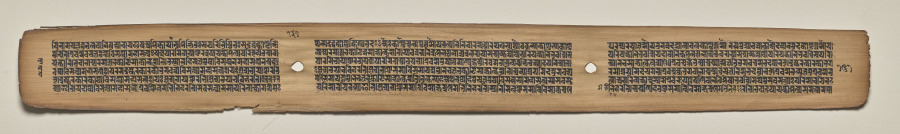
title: Text, Folio 131 (verso), from a Manuscript of the Perfection of Wisdom in Eight Thousand Lines (Ashtasahasrika Prajnaparamita-sutra)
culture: Eastern India, Bihar, Vikramashila Monastery. Painting: Nepal, Kathmandu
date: Sunday, September 14, 1119 (year 239 of the Newar Samvat in the month of Ashvina)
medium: gum tempera and ink on palm leaves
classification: Painting